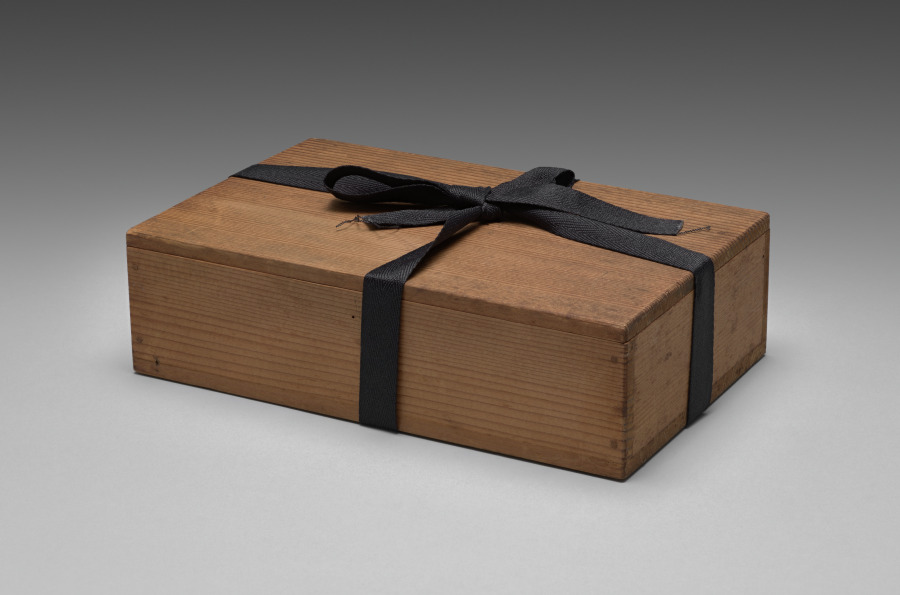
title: Saucers with Matching Shells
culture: Japan, Meiji period (1868–1912)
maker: Seifū Yohei III (Japanese, 1851–1914)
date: 1893–1914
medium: Pair of dishes; porcelain with green glaze and crackling, molded design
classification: Ceramic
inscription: 清風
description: Yohei III’s main output for his sophisticated clientele was in the form of tea sets and dining sets. He created a range of dishes in green glazes. He often produced in pairs, sets of five, or sets of ten. This pair of shell dishes have a box lid interior attestation by Yohei IV that the dishes were made by Yohei III with a cracked-ice (hyōretsu) pattern in the glaze, omitting reference to any glaze coloration.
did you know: These shell-shaped dishes are of the saucer type, suitable for dipping sauces.